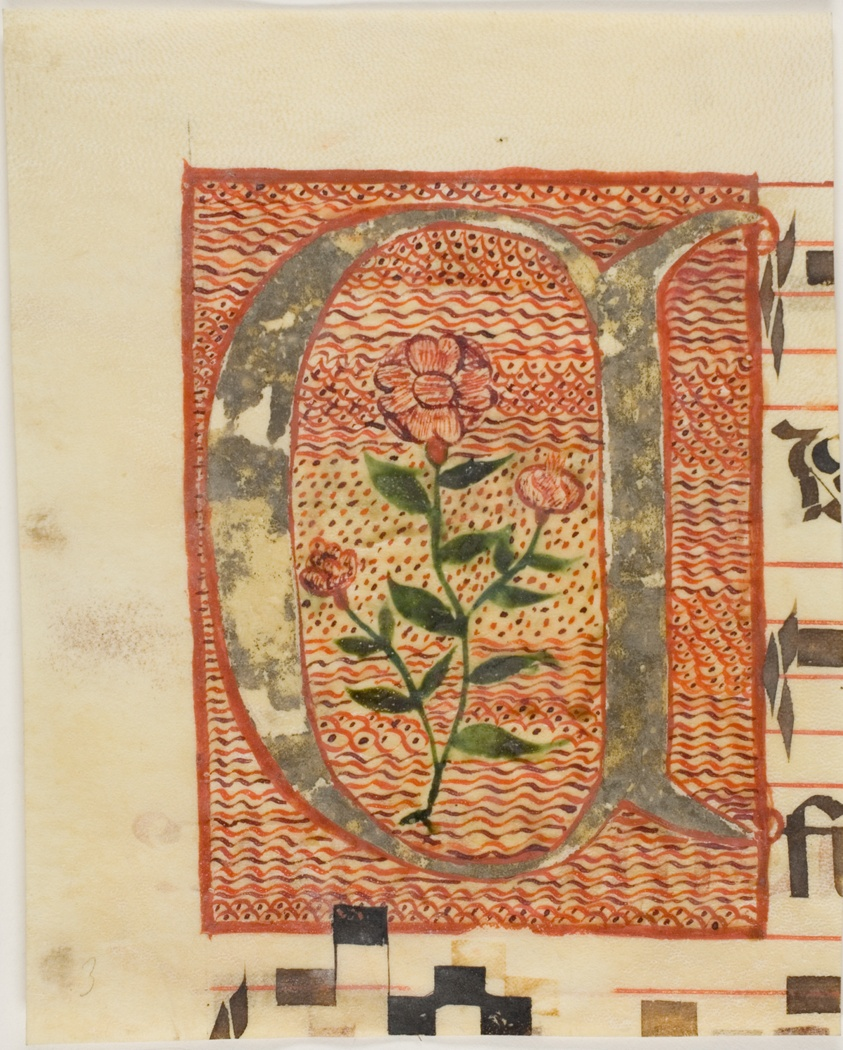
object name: Drawing and Watercolor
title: Decorated Initial "A" with Flower from a Manuscript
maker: European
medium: Manuscript cutting in tempera, colored inks, and silver leaf, with Latin inscriptions in brownish black and red inks, ruled in red, on vellum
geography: Europe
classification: tempera; drawings (visual works); prints and drawing